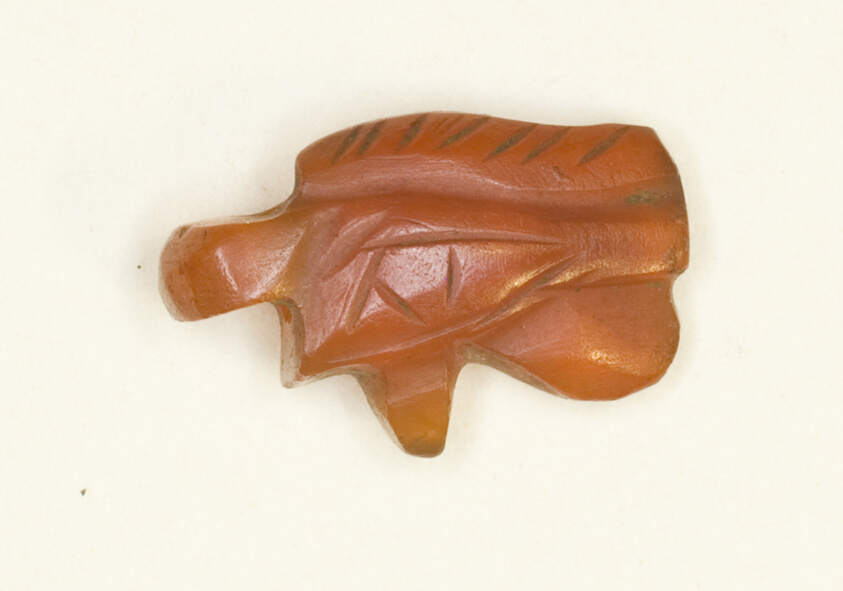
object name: Costume and Accessories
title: Eye of Horus (Wedjat) Amulet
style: middle kingdom, egyptian, ancient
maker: Egyptian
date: Middle Kingdom (?) (about 1700 BCE)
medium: Carnelian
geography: Egypt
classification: amulet; jewelry; stone; ancient art; costume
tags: eye of Horus